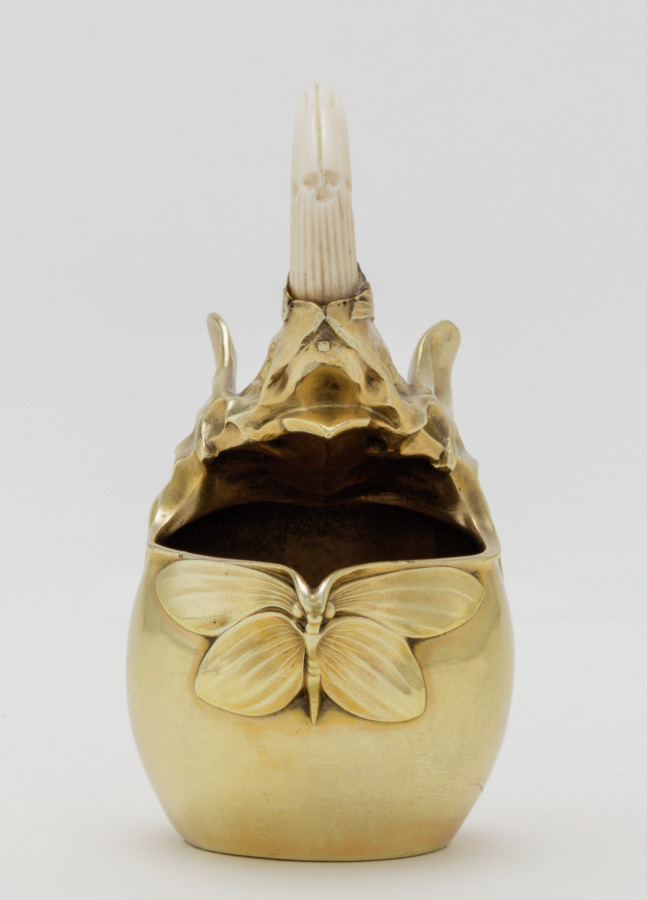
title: Creamer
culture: France, Paris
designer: Carlo Bugatti (Italian, 1856–1940)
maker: Adrien-Aurélien Hebrard (French, 1866–1937)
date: c. 1907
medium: Gilt silver and ivory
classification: Silver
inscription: Made by A. A. Hebrard Firm, Paris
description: This tea and coffee service, salver, and table, together with some now missing cups, were all designed by Carlo Bugatti as an ensemble and presented at the 1902 exposition devoted to decorative arts in Turin, Italy. The set was probably acquired from Bugatti's 1907 exhibition at the Galerie Hébrard in Paris by a wealthy South African widow, Anna Blake, who was living there at the time. Some of the animal and insect motifs suggest mythical beasts or the fossils of prehistoric animals. When Mrs. Blake returned to Cape Town, she took these and other pieces designed by Bugatti with her, and they remained in South Africa throughout her lifetime.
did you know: This creamer is part of a tea and coffee service designed by Carlo Bugatti.